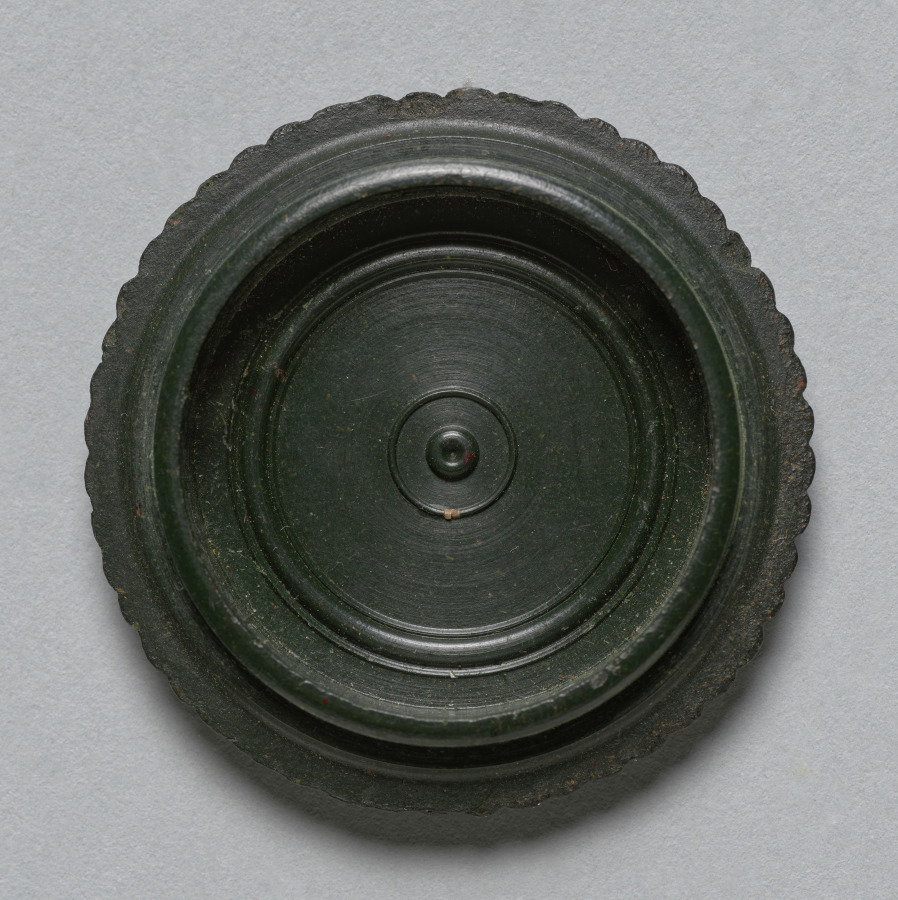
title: Portrait of a Young Woman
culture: America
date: c. 1855–60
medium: Tintype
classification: Photograph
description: It seemed a miracle that anyone could afford to have an accurate record of their own likeness or those of their loved ones. This portrait is an excellent example of the hundreds of thousands of portraits produced by commercial photographers in mid-nineteenth-century America. Small scale yet housed in an elaborately decorated thermoplastic case, it was intended to be carried by its owner or displayed on parlor tables or knickknack shelves.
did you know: During the first decades of photography, portraits far outnumbered every other type of image.